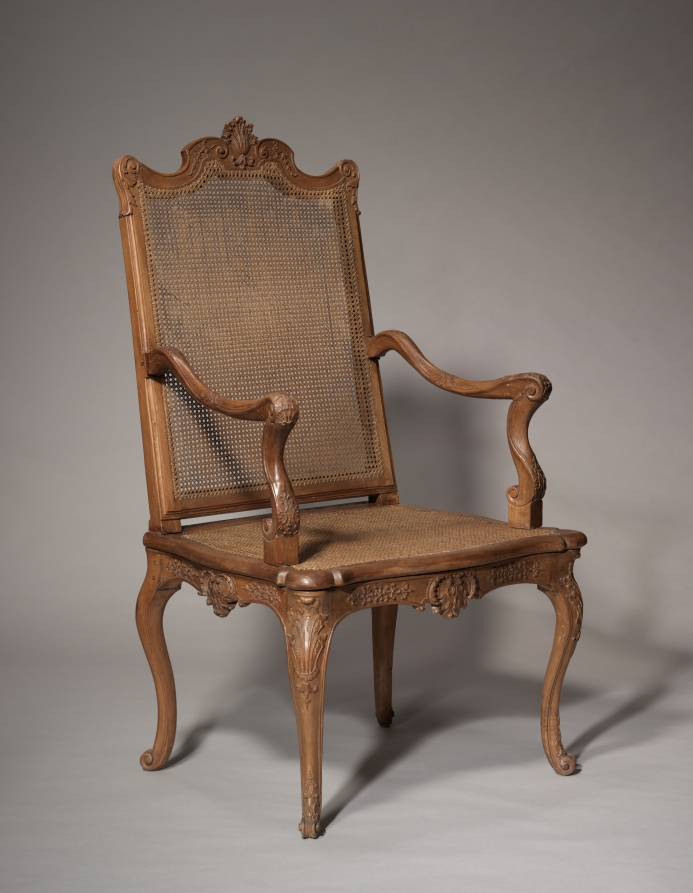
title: Armchair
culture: France, Regence Style, 18th Century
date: 1715–1730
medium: walnut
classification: Furniture and woodwork